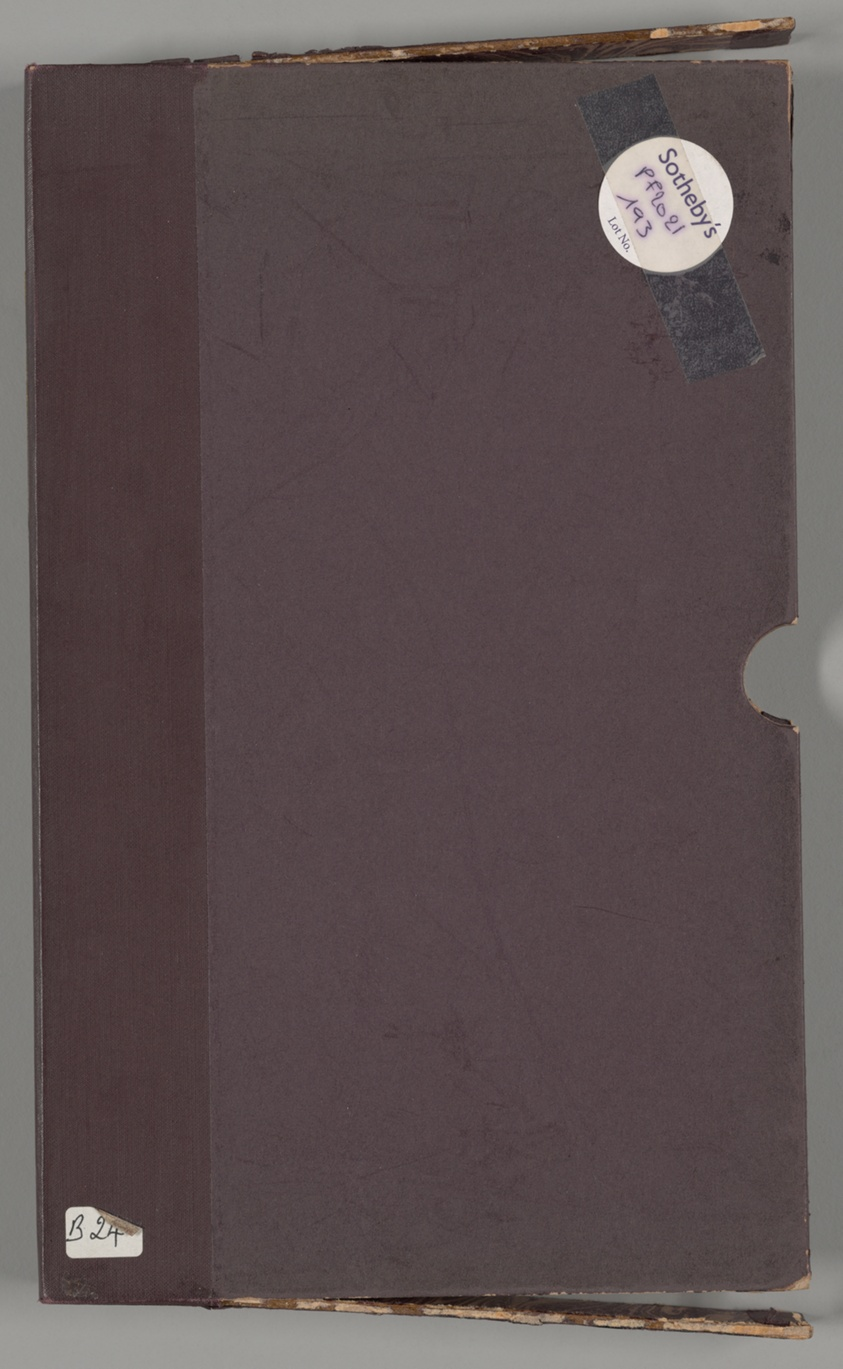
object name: Book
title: Soken sekisatsu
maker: Ito Jakuchu (Japanese, 1716-1800)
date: 1767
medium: Woodblock printed book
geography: Japan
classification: book